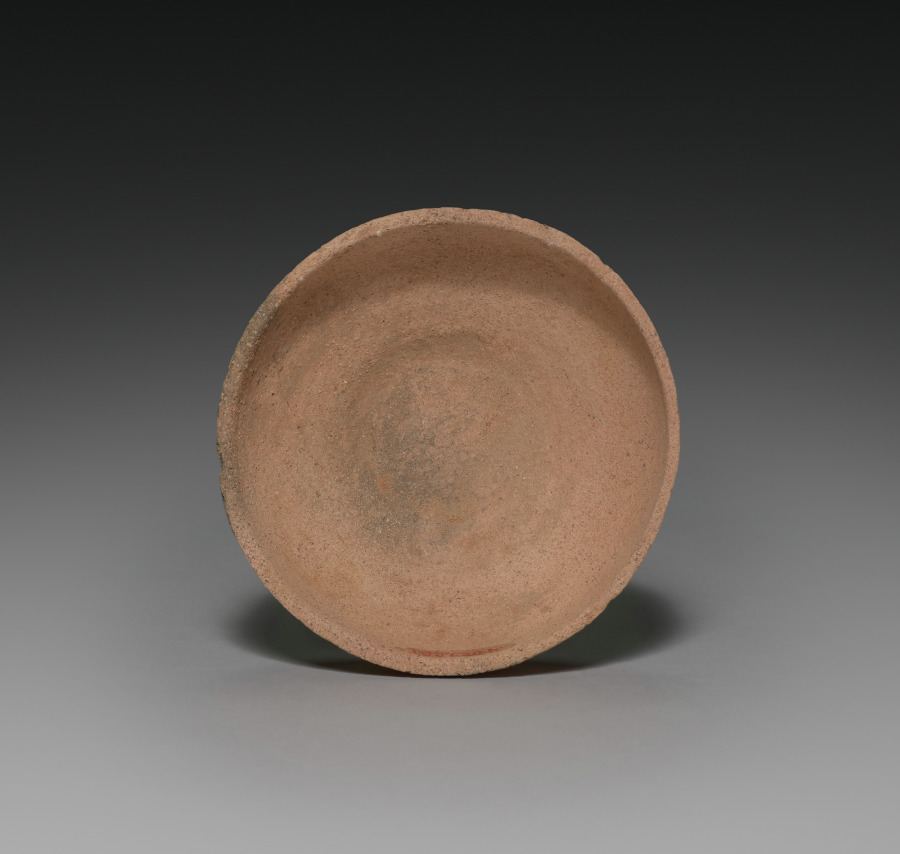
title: Lidded Jar (lid)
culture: Korea, Silla (57 BC-935) or Kaya (AD 42-562) period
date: 400s–500s CE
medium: red earthenware with incised band designs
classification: Ceramic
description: Early earthenware from the Three Kingdoms period (57 BCE–668 CE) became widely utilized as agriculture and religion grew to be essential elements in sustaining society and its systems. The clay jars of different sizes and shapes on display were made for the following purposes: to store harvested grains and seeds, or, especially lidded ones such as this, to preserve cremated remains, and to serve offerings in rituals.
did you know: Closed kilns built on hillsides became widely used for producing this type of pottery vessel in Korea during the Three Kingdoms period.